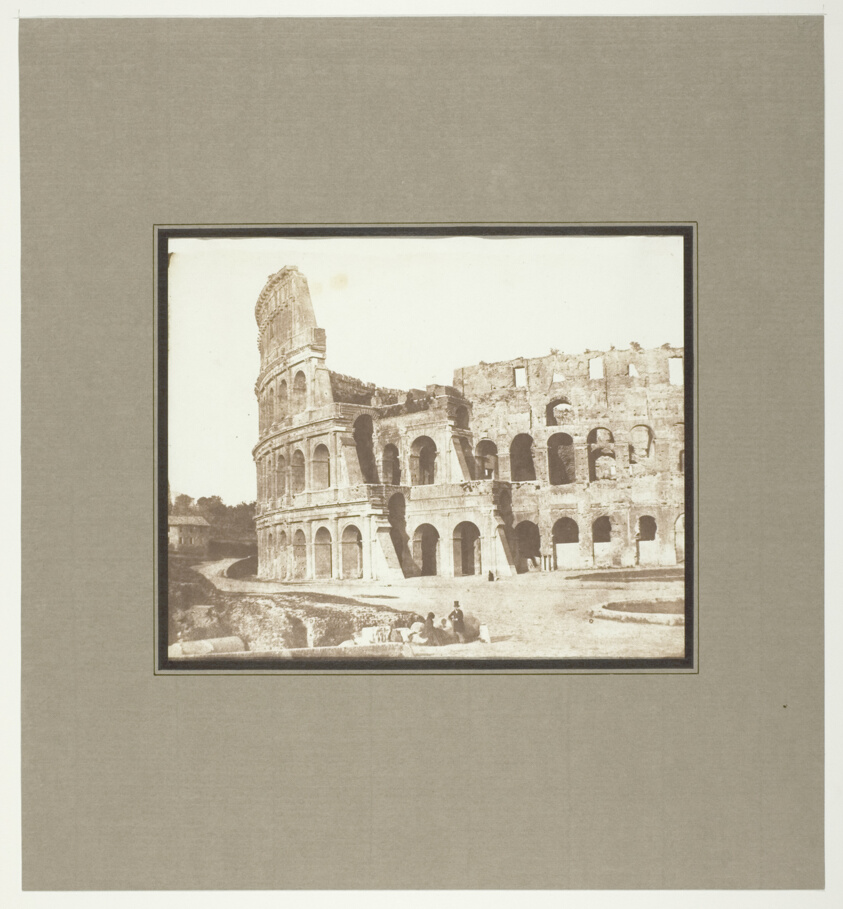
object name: Photograph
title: Colosseum, Rome, 2nd View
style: 19th century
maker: Rev. Calvert R. Jones (Welsh, 1804–1877)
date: May 1846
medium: Salted paper print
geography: Wales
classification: salted paper print; photographic process; photography; photograph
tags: Collected by Hugh Edwards